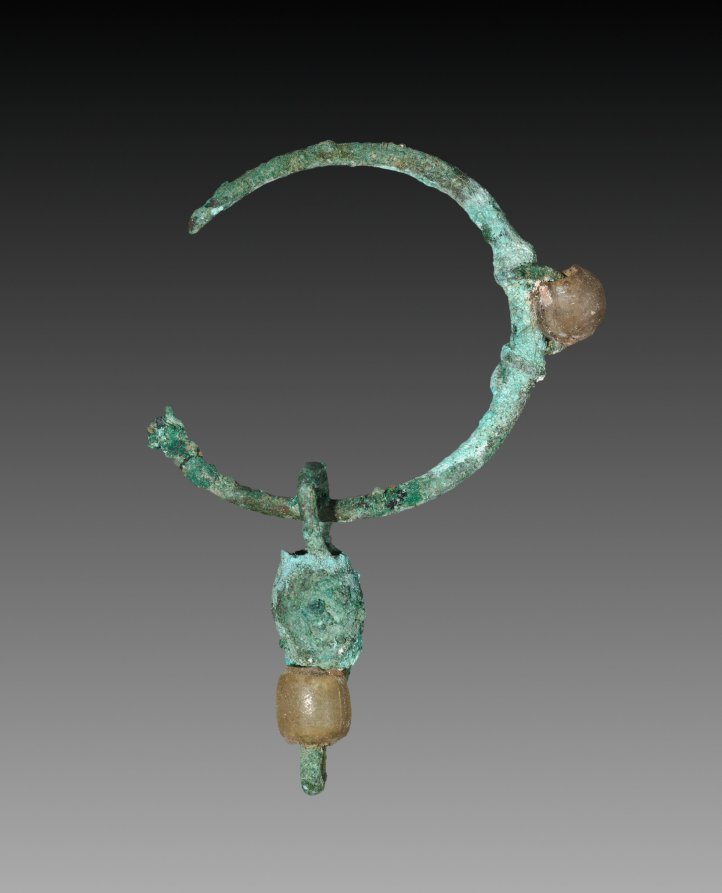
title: Earring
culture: Egypt, Greco-Roman period (332 BCE–395 CE), Roman empire (30 BCE–395 CE)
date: 30 BCE–395 CE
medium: bronze and glass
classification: Jewelry